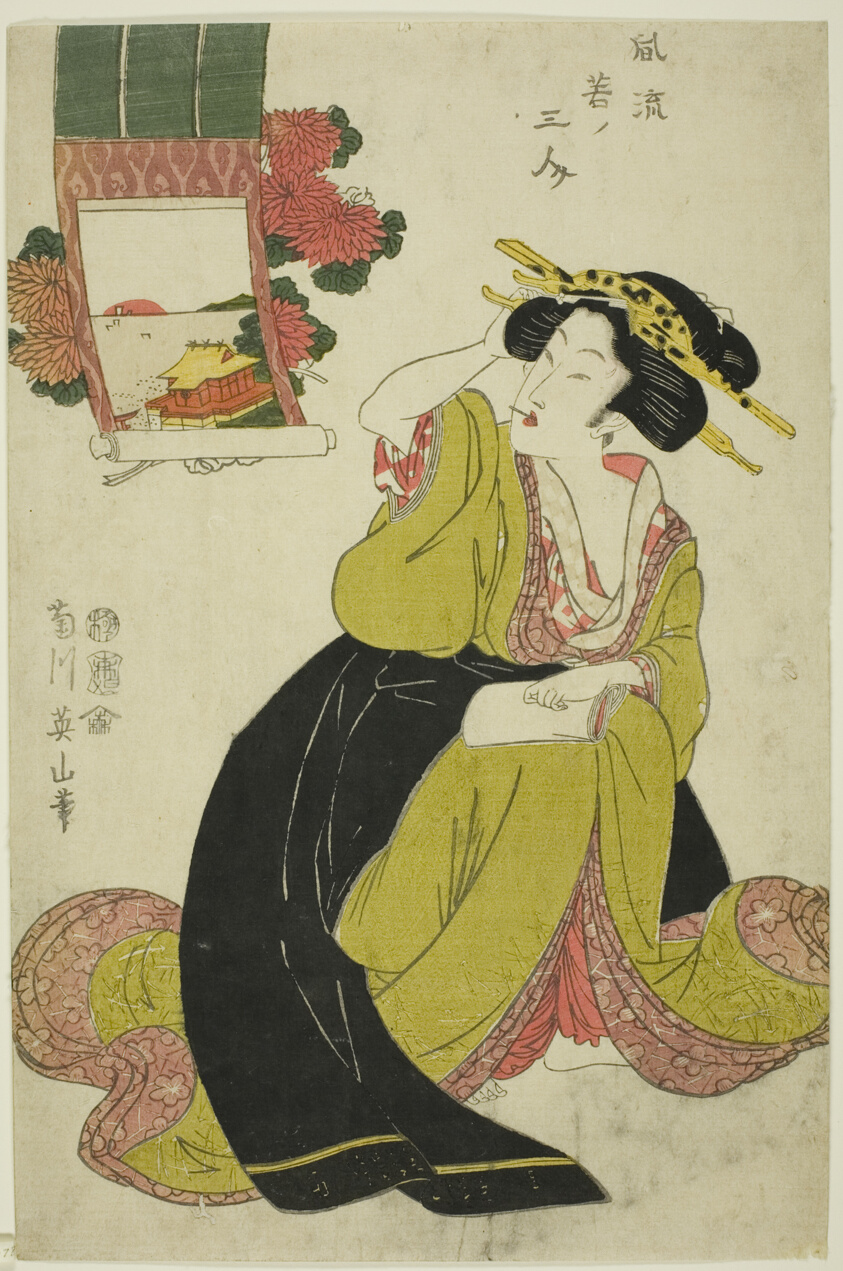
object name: Print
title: Tamatsushima, from the series "Three Fashionable Young Women (Furyu waka no sannin)"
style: Japanese (culture or style)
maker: Kikukawa Eizan (Japanese, 1787-1867)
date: c. 1811/13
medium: Color woodblock print; oban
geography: Japan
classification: woodblock print; print; asian art